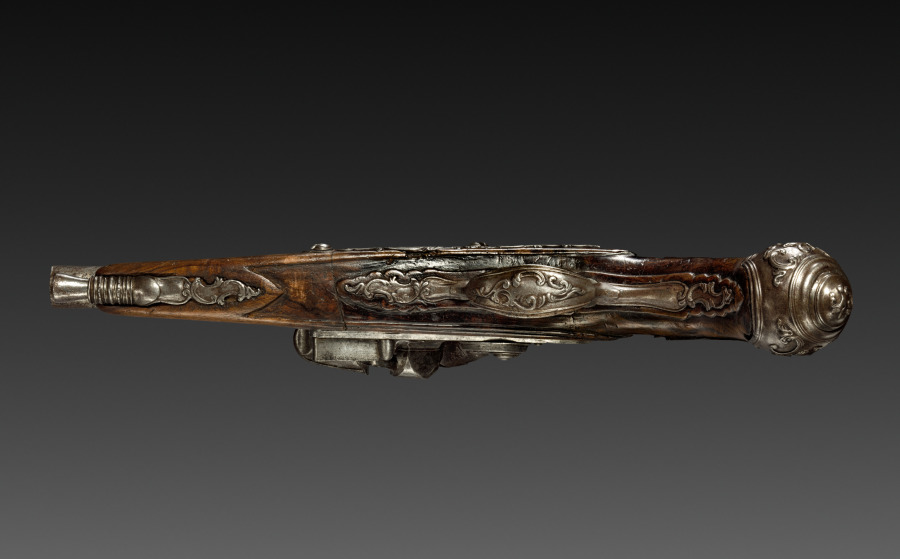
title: Flintlock Pistol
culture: Italy, Brescia, 18th century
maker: Bortolo Agazzi (Italian)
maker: Lazaro Lazarino (Italian)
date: 1700s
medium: steel with traces of gilding; walnut stock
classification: Arms and Armor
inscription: on lock: Bortolo Agazzi; on barrel: Lazaro Lazarino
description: The flintlock was the most popular style of lock in all of Europe in the mid 1600s through the 1700s except in Spain and Italy where the snaphance was more dominant. This pistol's shine comes from the gold that was applied to the steel shaft. This shiny surface is set off by the rich walnut stock. Upon close inspection, you can see areas of damage to the walnut and even a missing section of decoration on the rear of the handle.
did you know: The term flintlock is used to describe any firearm that uses a flint-striking ignition mechanism.